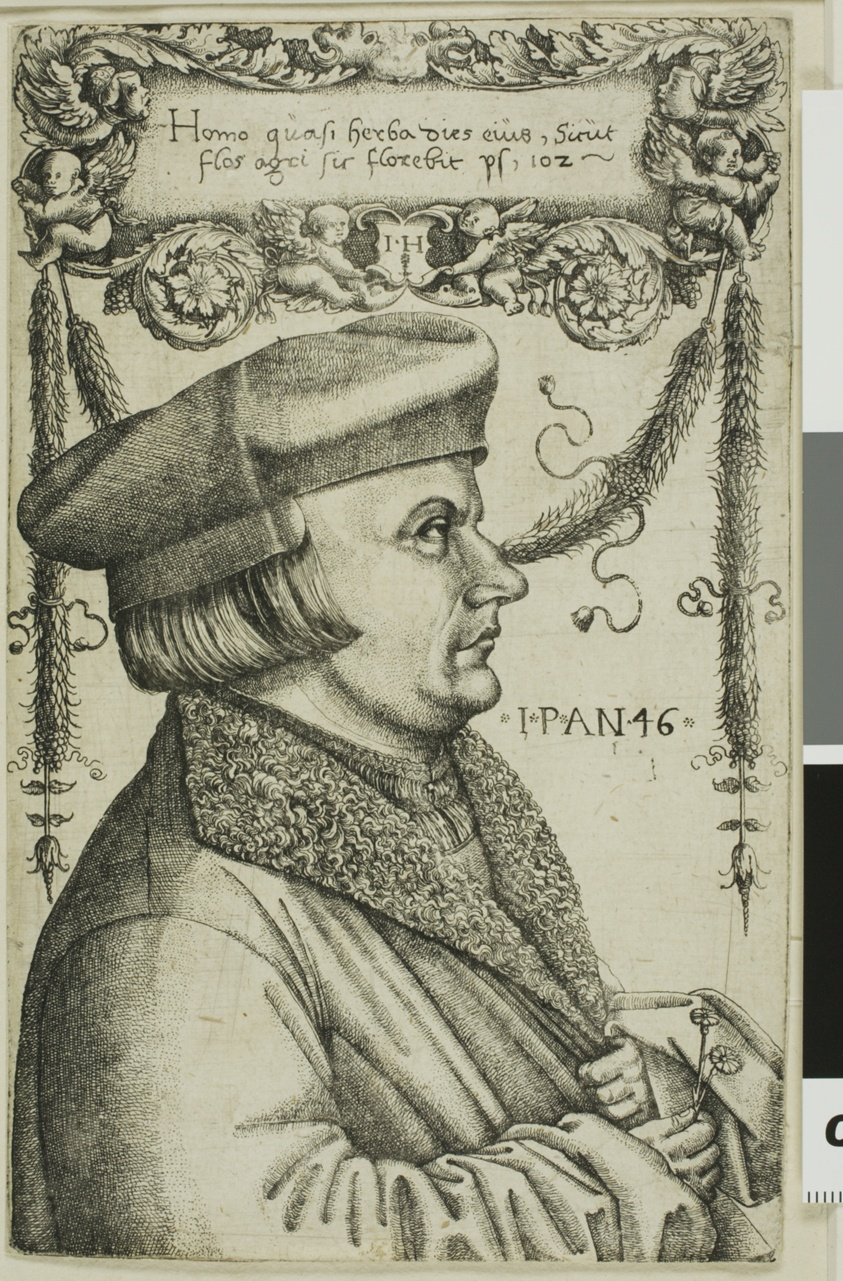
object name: Print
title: Portrait of a Man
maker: Hieronymous Hopfer (German, active 1520-1550)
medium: Etching on paper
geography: Germany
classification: etching; print; prints and drawing